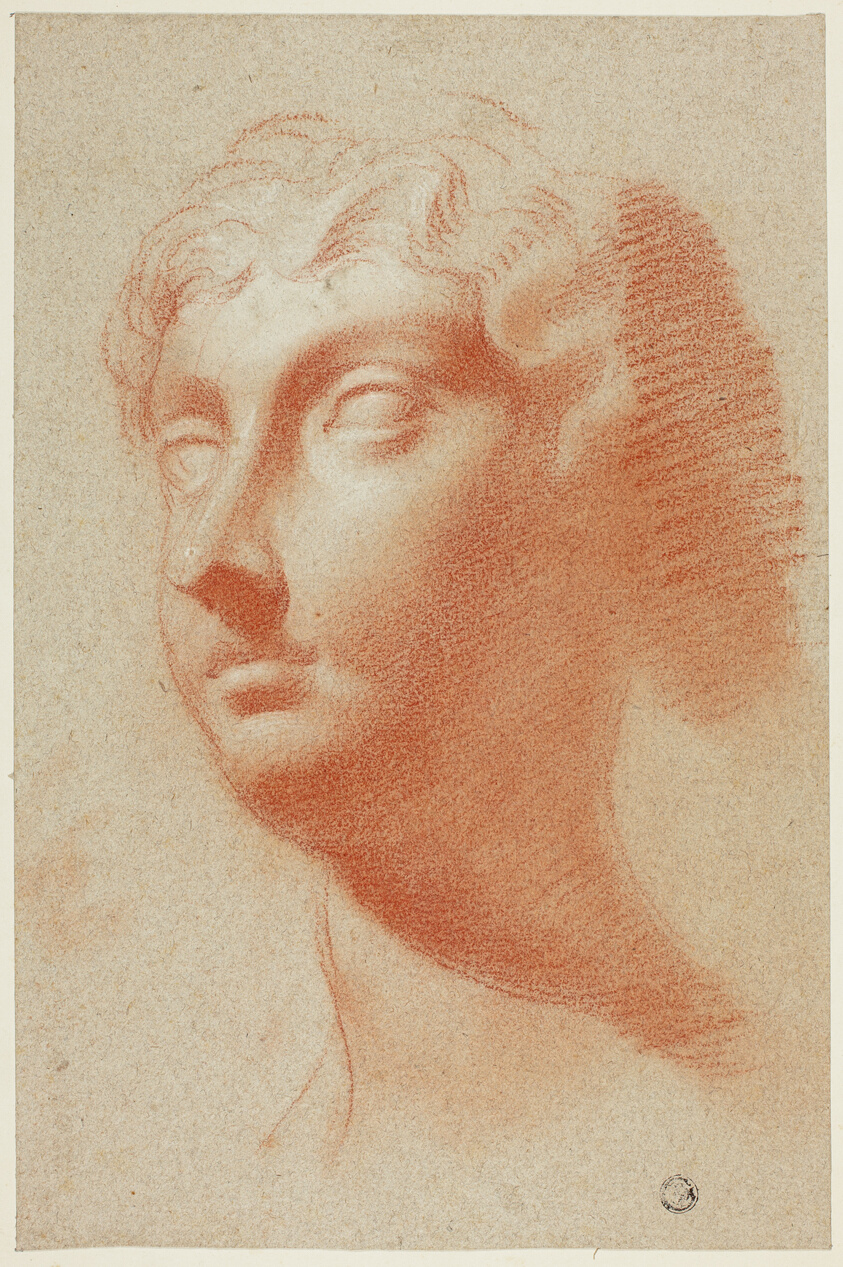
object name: Drawing and Watercolor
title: Female Head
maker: Attributed to Pietro Dandini; Italian, 1646-1712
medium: Red chalk, heightened with white chalk, on brown laid paper, laid down on board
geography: Italy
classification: chalk; drawings (visual works); prints and drawing